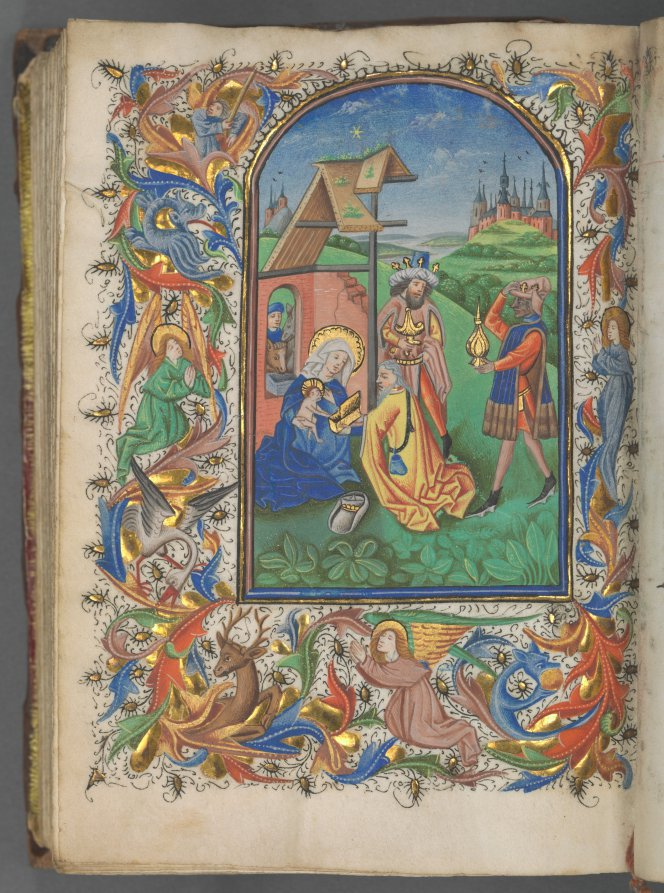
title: Book of Hours (Use of Utrecht): fol. 221v, Adoration of the Magi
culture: Netherlands, Utrecht, 15th century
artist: Master of Gijsbrecht van Brederode (Netherlandish)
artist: Master of the Boston City of God (Netherlandish)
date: c. 1460–1465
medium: ink, tempera, and gold on vellum; binding: brown Morocco over original wooden boards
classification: Bound Volume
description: This manuscript is a collaborative effort of two talented illuminators with distinctive styles. Ninety-seven historiated initials (letters containing scenes), including the one on recto (right side) shown here, are by the Master of the Boston City of God, a painter who worked in Utrecht. Four full-page miniatures (small paintings), including the Nativity on the verso (left side), have recently been attributed to the Master of Gijsbrecht van Brederode. The background of the Nativity depicts a distant cityscape (perhaps Utrecht), adjacent to which may be seen the Journey of the Magi and the Annunciation to the Shepherds. In the left margin, the Virgin Mary (above) appears to the Roman Emperor Augustus and the Tiburtine Sibyl, who, according to legend, foretold the coming of Christ. This volume is not written in Latin, but in a Dutch littera textualis, an elegant Gothic bookhand.